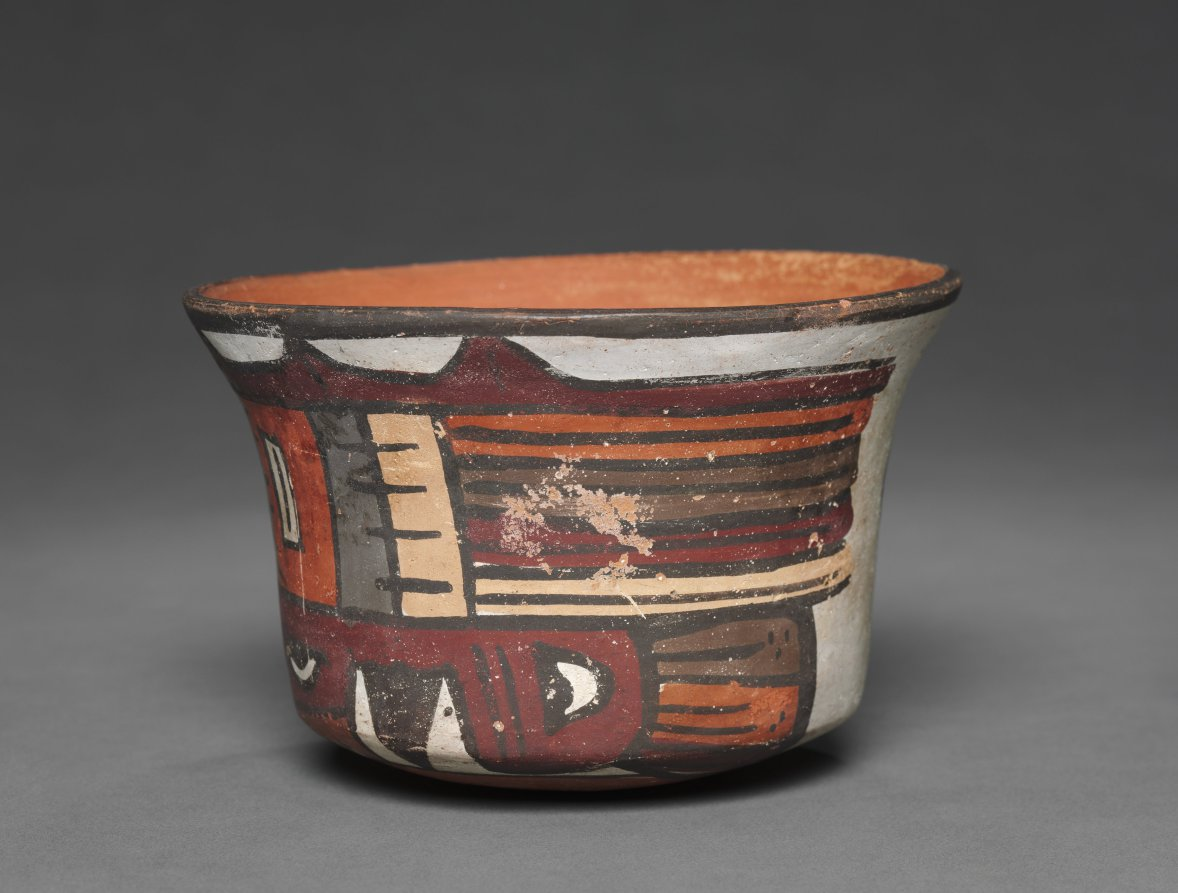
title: Bowl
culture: Peru, South Coast, Nasca, Florescent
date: 100 BCE–700 CE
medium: earthenware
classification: Ceramic